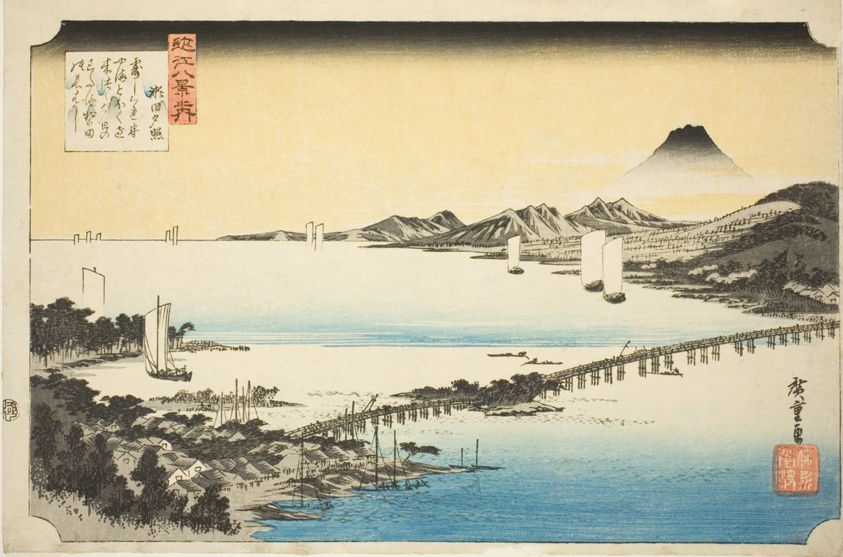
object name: Print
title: Evening Glow at Seta Bridge (Seta no sekisho), from the series "Eight Views of Omi (Omi hakkei no uchi)"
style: Japanese (culture or style)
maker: Utagawa Hiroshige 歌川 広重; Japanese, 1797-1858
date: c. 1834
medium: Color woodblock print; oban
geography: Japan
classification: woodblock print; print; asian art